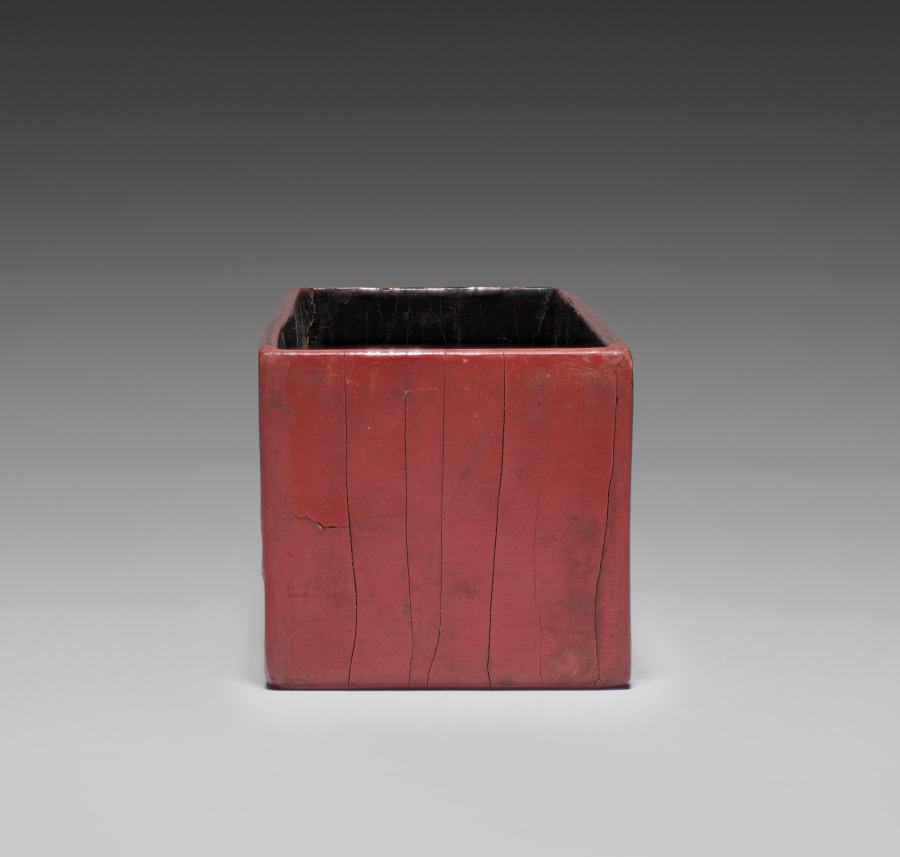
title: Drawer for a Tihong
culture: China, Ming dynasty (1368-1644), Wanli reign (1572-1620)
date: 1585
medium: carved cinnabar lacquer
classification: Lacquer